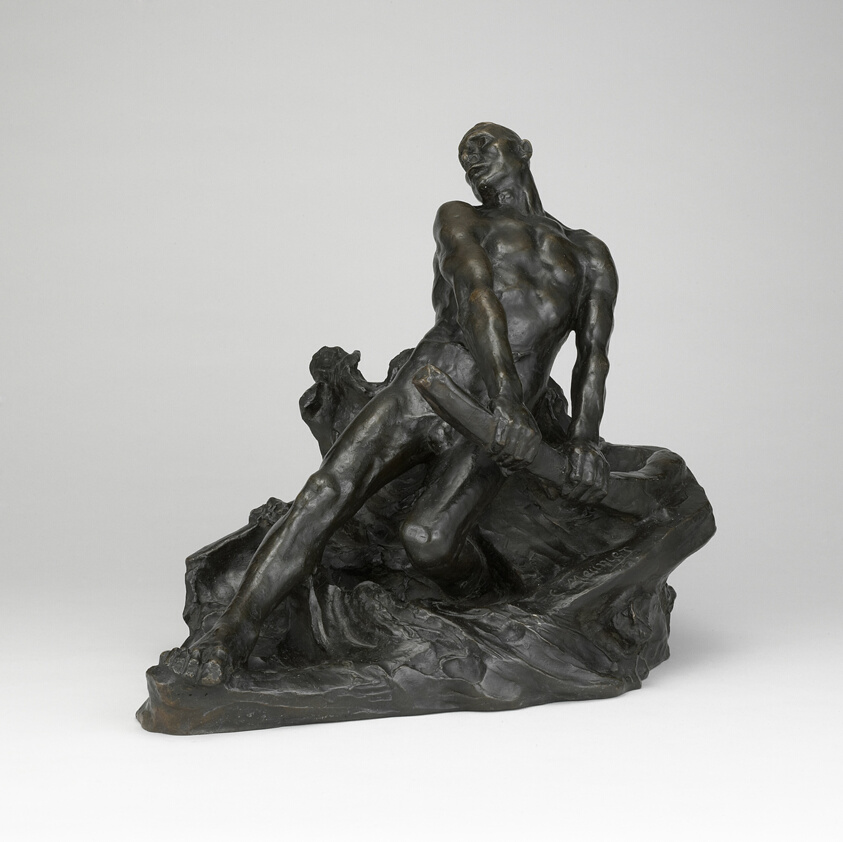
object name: Sculpture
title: Shipwrecked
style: Realism, 19th century, nineteenth century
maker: Constantin Emile Meunier (Belgian, 1831–1905)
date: c. 1890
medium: Bronze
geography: Belgium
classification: statuette; sculpture; bronze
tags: man, figure, water, wood